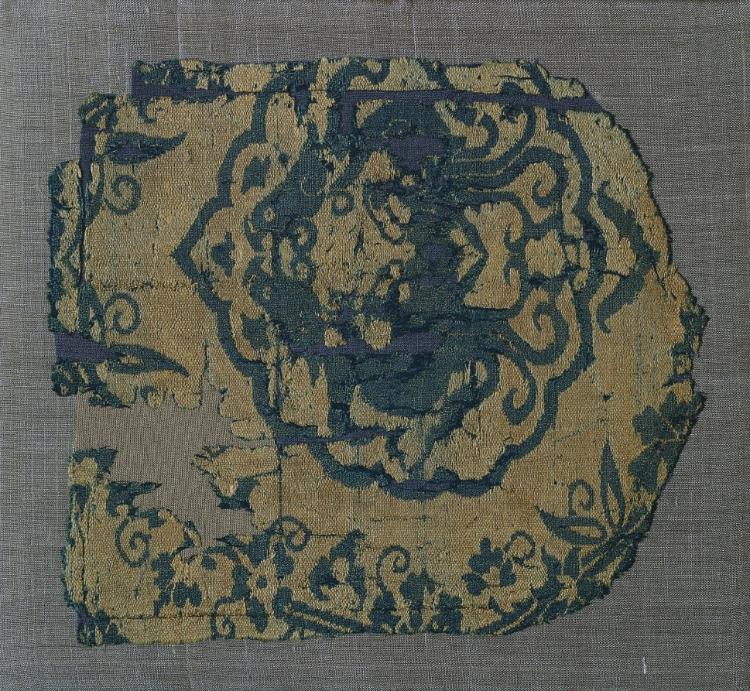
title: Fragment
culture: China, Yuan dynasty (1260-1368)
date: 1279–1368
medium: lampas weave, silk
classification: Textile